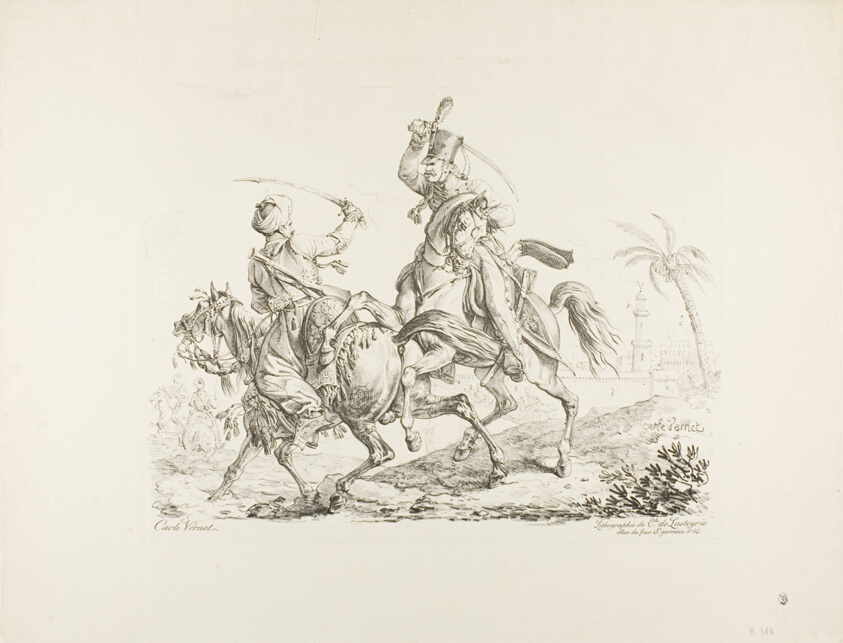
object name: Print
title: Hussard Killing a Mameluk with a Sabre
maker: Carle Vernet (French, 1758-1836); printed by Comte Charles Philibert de Lasteyrie (French, 1759-1849)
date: February 8, 1817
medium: Lithograph in black on ivory wove paper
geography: France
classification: lithograph; print; prints and drawing